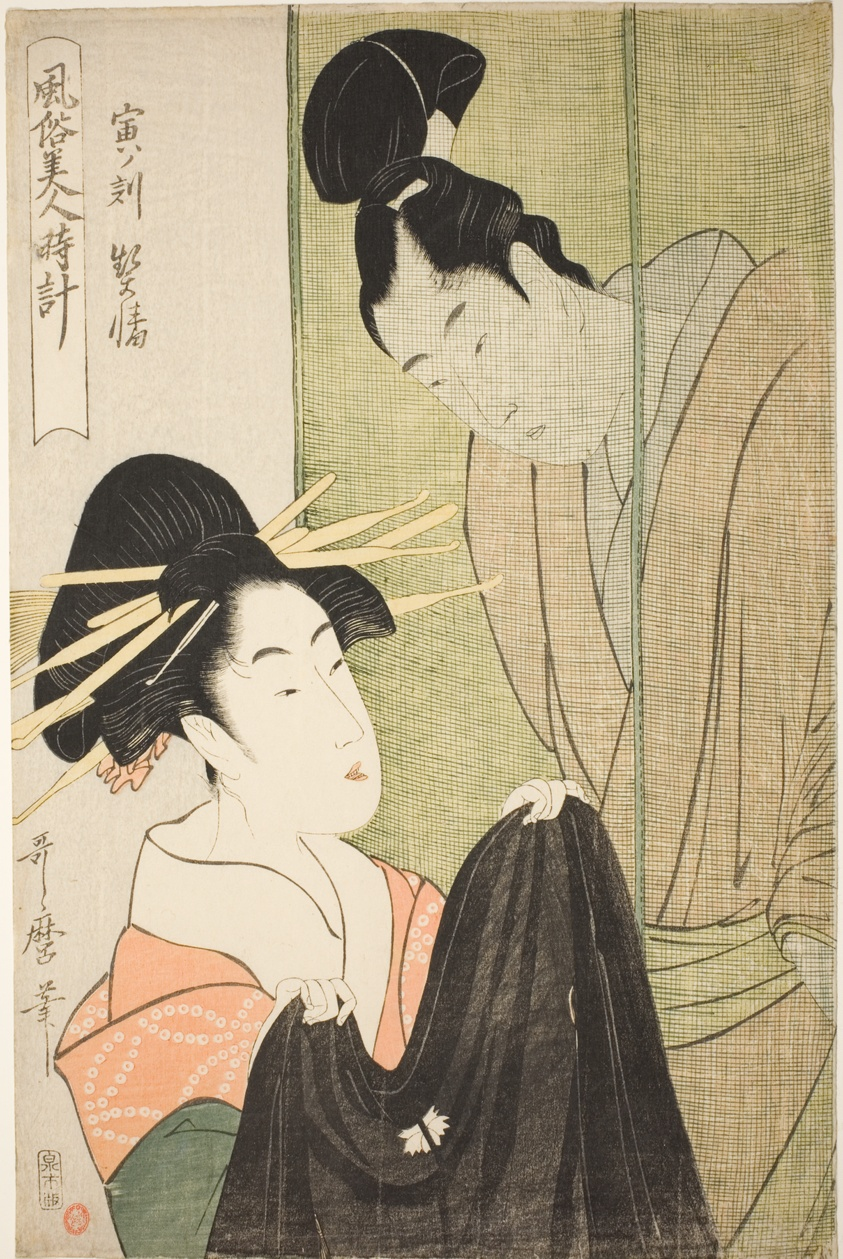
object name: Print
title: Hour of the Tiger [4 am], Courtesan (Tora no koku, keisei), from the series "Customs of Beauties Around the Clock (Fuzoku bijin tokei)"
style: Japanese (culture or style)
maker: Kitagawa Utamaro 喜多川 歌麿; Japanese, 1753 (?)-1806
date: c. 1798/1800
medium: Color woodblock print; oban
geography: Japan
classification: woodblock print; print; asian art